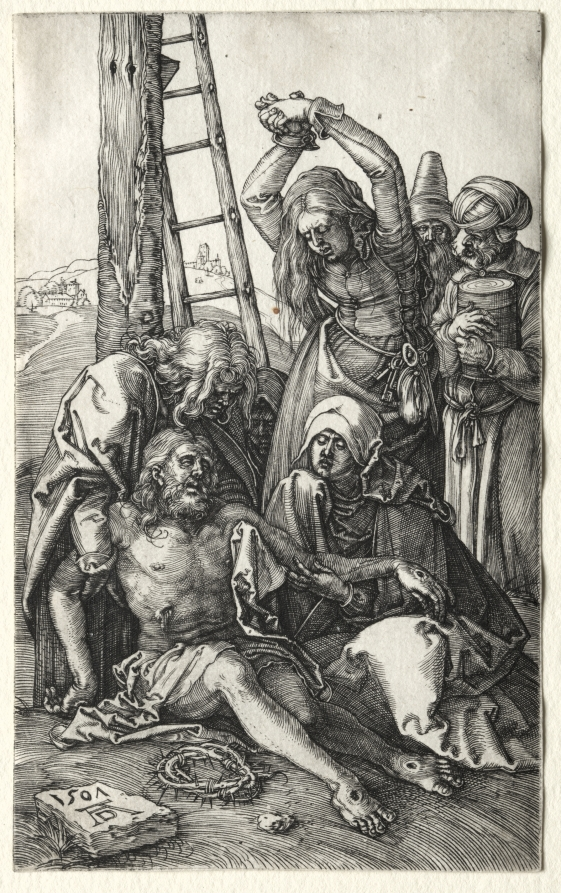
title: The Lamentation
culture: Germany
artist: Albrecht Dürer (German, 1471–1528)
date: 1504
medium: engraving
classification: Print